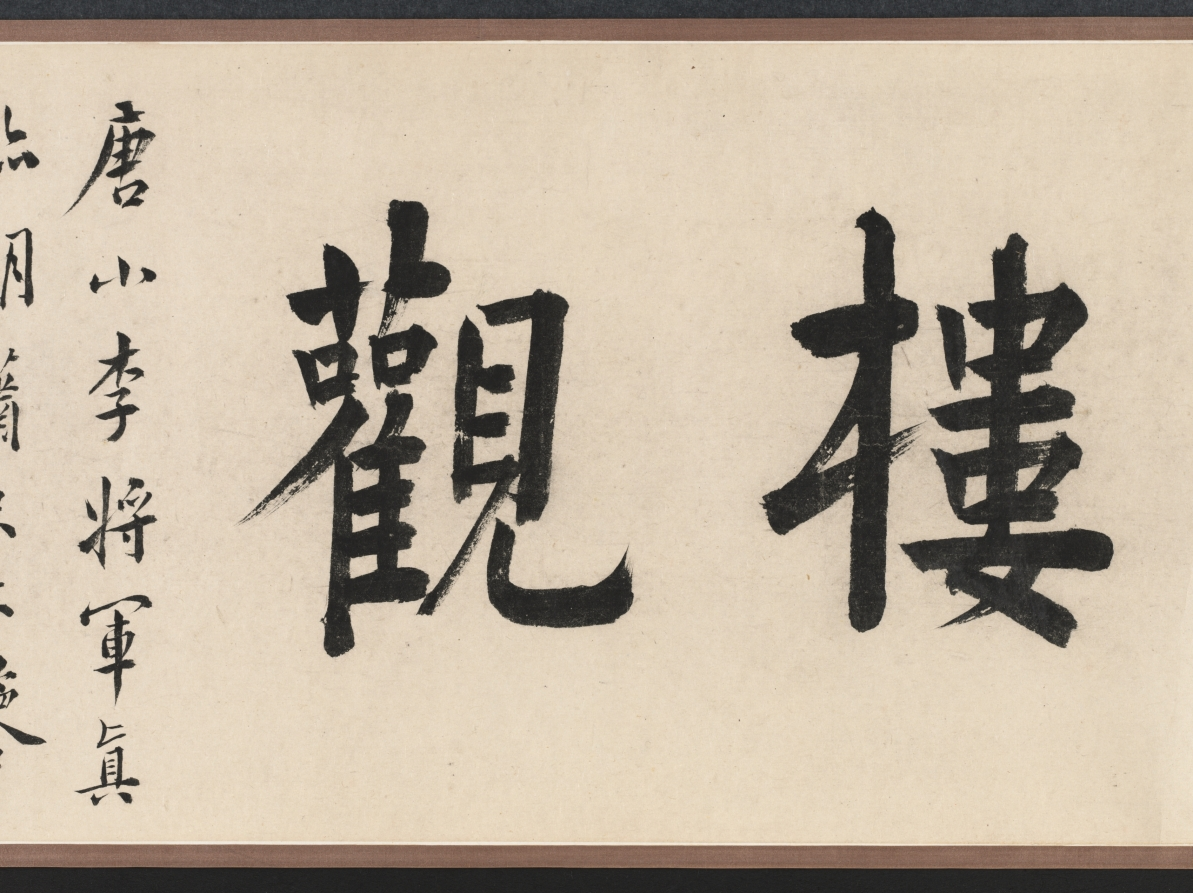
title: Waiting for the Moon in the Mid Autumn Festival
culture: China, Ming dynasty (1368–1644)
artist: Shi Rui (Chinese, c. 1400-c. 1470)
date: 1400s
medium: handscroll, ink, color, and gold on silk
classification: Painting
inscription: [印] 石氏以明; 游戯翰墨.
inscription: 僊山樓觀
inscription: 1 inscription, dated 1639, and 1 seal of Xiao Yuncong 蕭雲従 (1596-1673). Inscription by Xiao Yuncong: This is a painting by the Junior General Li. The painting is damaged and cracked at many places. Many of the paper strips for backing have been missing since long ago, but the colors are still fresh as if they had just been applied and the ink still looks moist. During the reign of Tianbao (742-756) of the Tang Dynasty, the Imperial Klansman Li Sixun was summoned to paint the walls of the Datong Hall. He was known as the "Senior General." His son, who came to be known as the "Junior General," was named Zhaodao. Of the stone epitaph [Li Sixun bei, or the "epitaph of Li Sixun," one of the best known calligraphic monuments of the Tang Dynasty], engraved with the calligraphy of Li Beihai 李北海 [Li Yong 李邕, 678-747], more than half has fallen off. Why, in contrast, was this painting able to survive? Or could it be that despite the fact that the stone is hard and the silk is soft, their preservation or destruction depends on some other factors? Moreover, since they were titled nobility of imperial descent, it is doubtful that they had the leisure and the mood to indulge in such decorative and descriptive blue and gold painting for the mere amusement of their fellow men. Recently, I read the Yi zhou ming hua lu 益州名畫錄 [by Huang Xiufu 黃休復, preface 1005]. I found a certain Li Chin-nu who compared himself with Li Zhaodao 李昭道 and was called by the Sichuan people the Junior General Li. In a painting which he did, entitled Mt. Ch'ing-ch'eng, the architectural structure of the pavilions, terraces, bridges, and boats are meticulous and accurate. The horsemen on a spring outing are as small as grain and the wild geese among the clouds as tiny as dust. It was also said that he painted on silk of any length in accordance to specific commissions. Is it possible that this painting is one of his? Since that time 700 years have passed. Yet one of the two Junior General Li's must be our painter. Formerly, there were the so-called "Four Excellents" in the Hall of Portraits of the Buddhist monk Wu-ta Kuo-shih: the [portrait] painting by Ch'ang Ts'an [act. ca. 881-888}, the calligraphy by Priest Tao-ying, the eulogy by Li Shangyin 李商隱 [813-858], and the landscape by Li Sheng [act. ca. 908-925]. This Li Sheng was styled Chin-nu and was also called Junior General Li. In the tenth month of the Chi-mao year, the twelfth year of the Chongzhen era [1639], recorded by Xiao Yuncong of Wuhu. trans. WKH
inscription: 4 colophons and 30 additional seals: 1 seal of Xu Qianxue 徐乾學 (1631-1694); 1 seal of Li Chien 黎簡 (1747-1799); 1 seal of Chang Chin-fang (18th c.); 2 seals of Sun Erzhun 孫爾準 (1770–1832); 1 colophon and 2 seals of Zhang Weiping 張維屛 (1780-1859); 1 seal of Wu Rongguang 吳榮光 (1773-1843); 1 colophon and 2 seals of Luo Tianchi 羅天池 (1826 jinshi); 7 seals of Wu Yanhui 伍元蕙 (active 1821–1851); 2 colophons and 4 seals of Pan Zhengwei 潘正煒 (1791-1850); 9 seals unidentified.